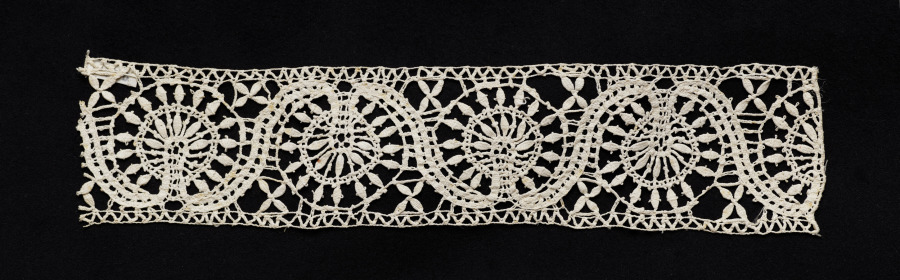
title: Lace Insertion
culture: Italy, Genoa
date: 1600s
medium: Bobbin lace (needle lace, reticella design)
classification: Lace